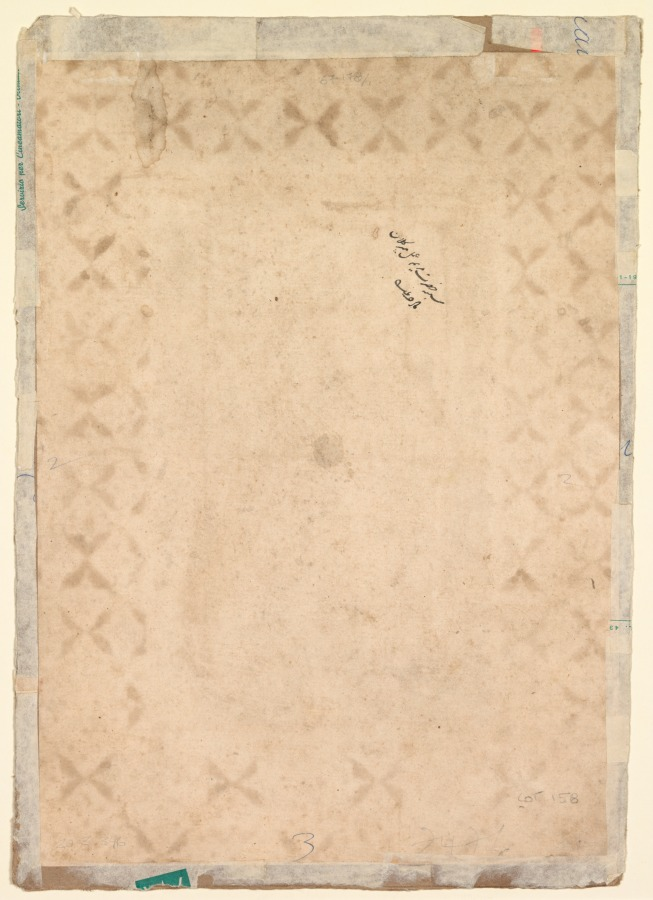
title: Jesus among the doctors in the Temple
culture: India, Lucknow, Mughal, 18th century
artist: Mir Kalan Khan (Indian, c. 1730–1775)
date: c. 1760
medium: Gum tempera and gold on paper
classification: Painting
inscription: Persian inscription on verso: an image of Blessed Miriam, work of Mir Kalan Khan